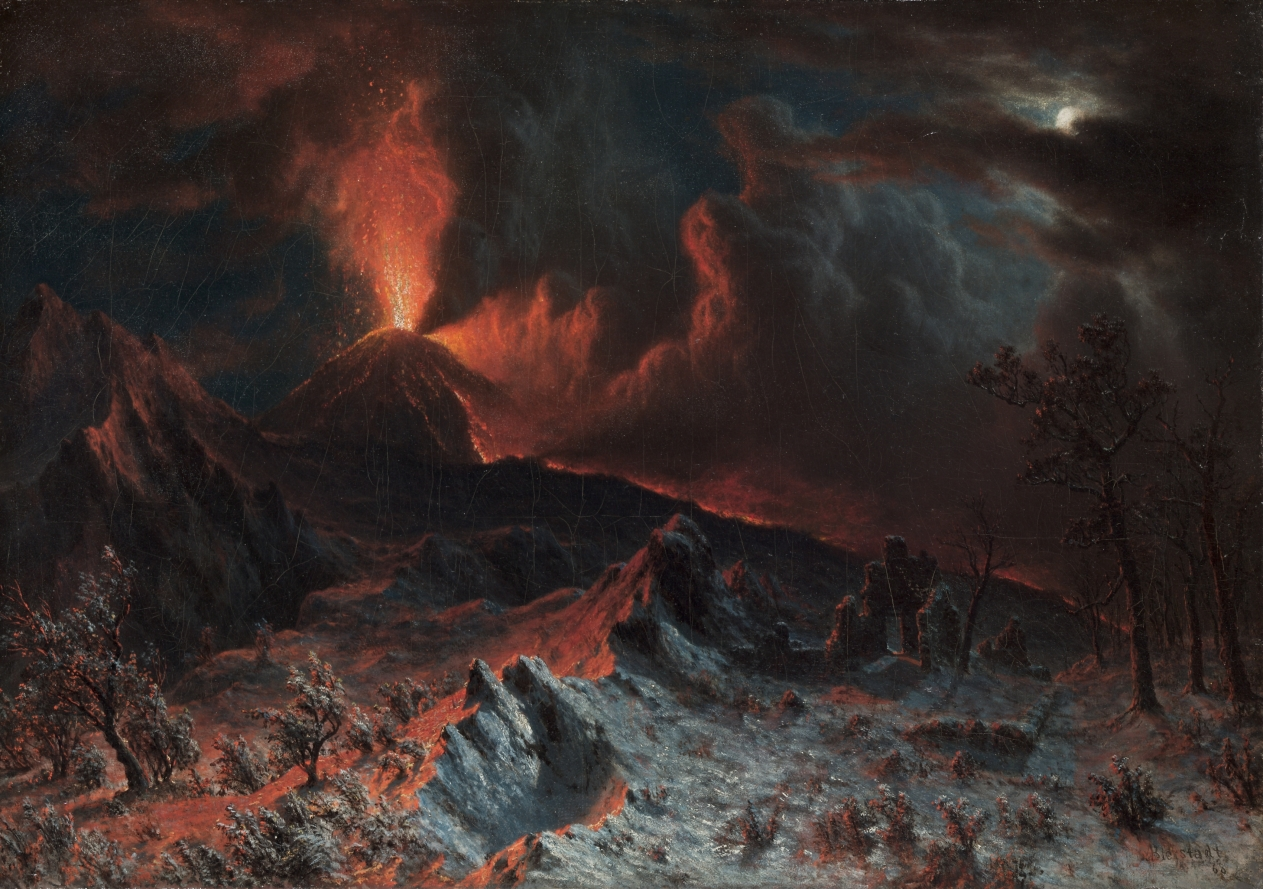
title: Mount Vesuvius at Midnight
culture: America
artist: Albert Bierstadt (American, born Prussia [now Germany], 1830–1902)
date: 1868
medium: oil on canvas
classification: Painting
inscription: signed lower right: ABierstadt / 68 [AB in monogram]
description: For centuries, artists and tourists have been attracted to Mount Vesuvius, a volcano near Naples. While living in London in 1868, Albert Bierstadt heard that the volcano was active once again, and rushed immediately to Italy. It is not certain that he actually saw an eruption, although the resultant painting presents a convincing image of spewing lava and ash.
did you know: This painting is a smaller version of a much larger canvas that is now lost.